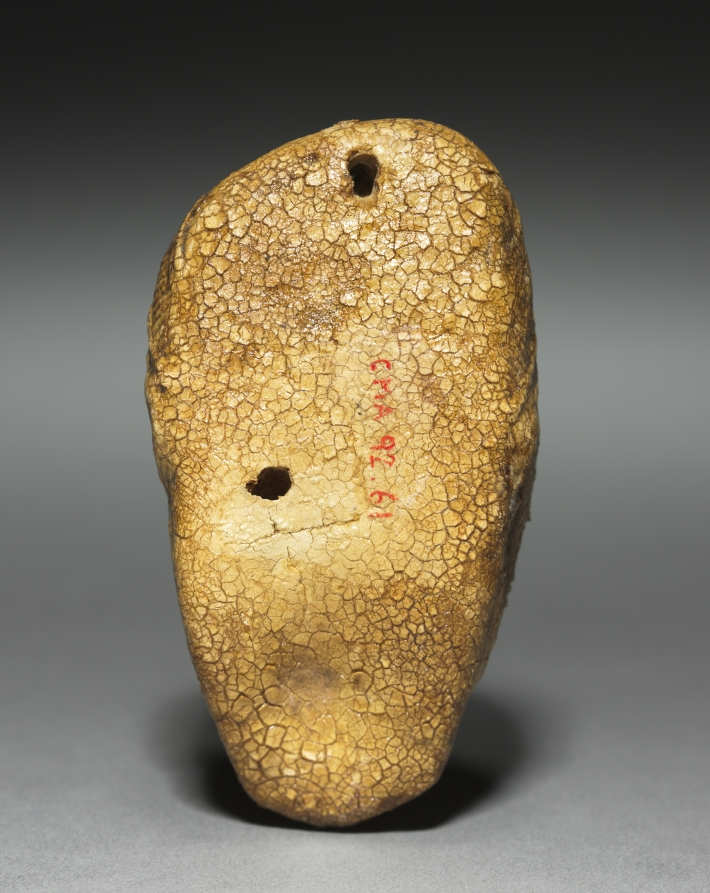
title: Head of a Woman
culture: Italy, Etruscan, "Italic"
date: 600s BCE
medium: amber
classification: Sculpture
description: Amber, a form of fossilized tree resin, was much prized in the ancient Mediterranean world, perhaps due to its mysterious luminosity, fragrance, and magnetism. It was often carved into figures or heads of humans, animals, or mythical creatures. Small perforations on this head suggest that it may once have been mounted, perhaps for use as a pendant. Although now opaque and crackled due to age, in antiquity the surface probably exhibited some degree of translucence, a valued attribute for amulets and ornaments.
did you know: Amber is fossilized ancient tree sap, often imported from the Baltic to the Mediterranean region.